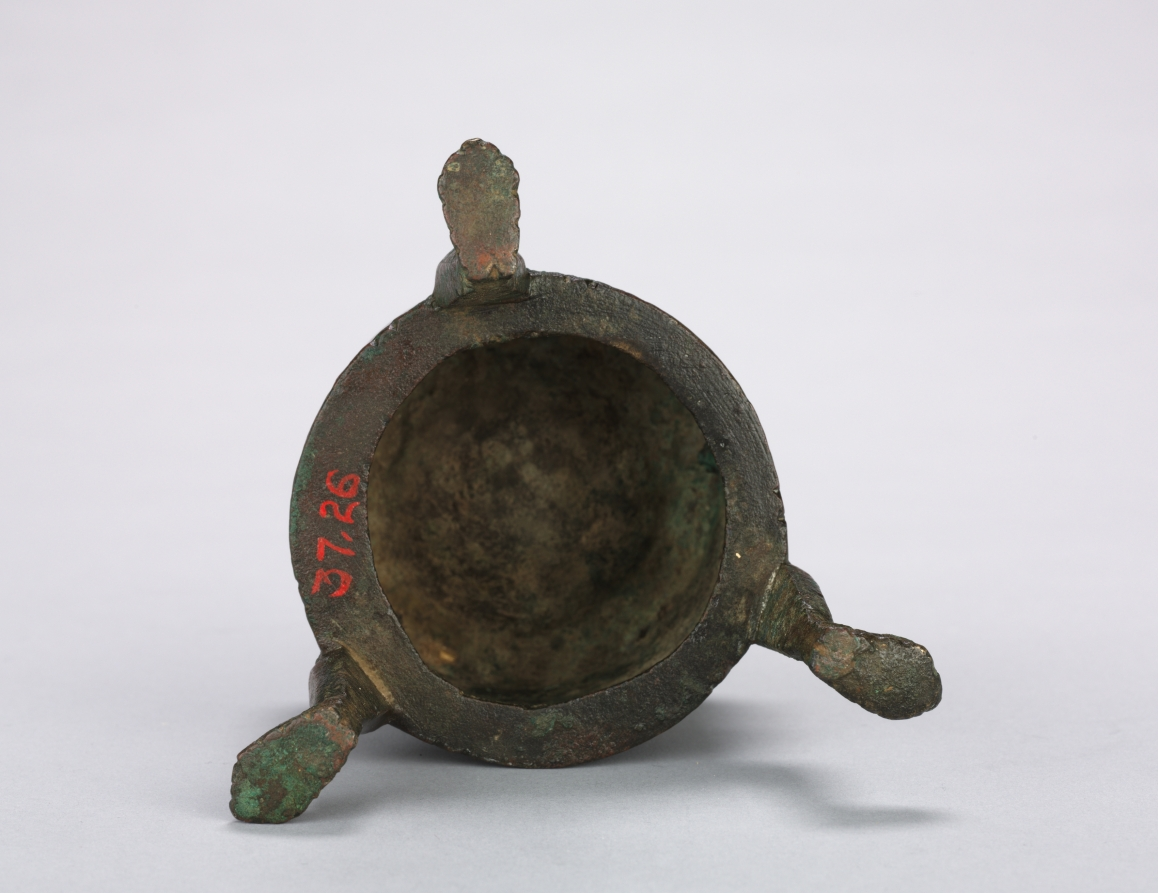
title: Incense Burner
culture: Syria, Ayyubid Period, 13th Century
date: 1200–1250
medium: brass inlaid with silver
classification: Metalwork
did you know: This footed vessel is wearing shoes.